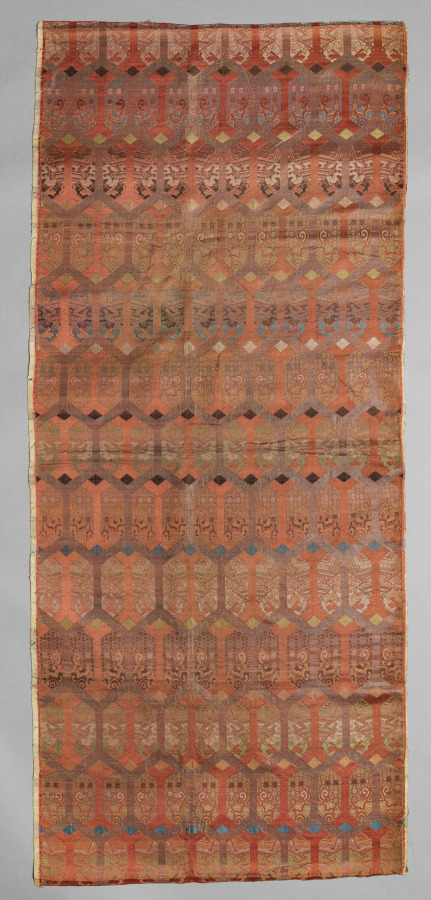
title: Square Textile Cover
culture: Japan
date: 1800s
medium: Brocaded silk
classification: Textile